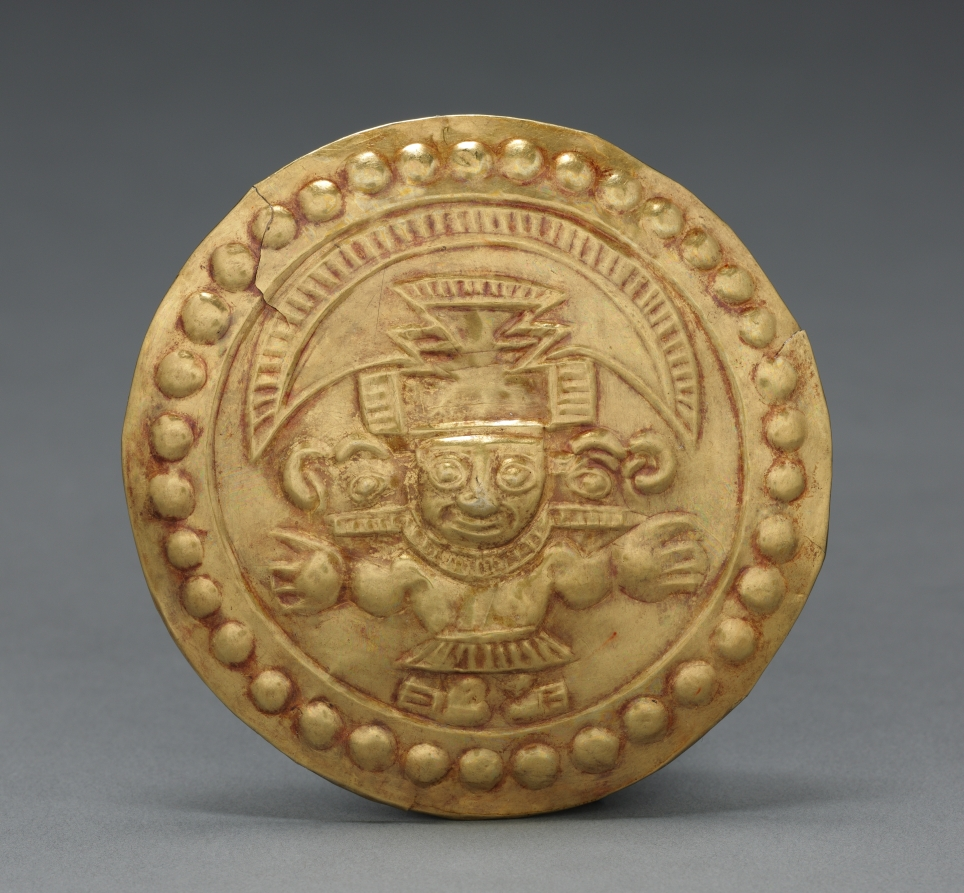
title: Ear Flare Frontal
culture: Peru, North Coast, Paramonga(?), Chimú style (900-1470)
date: Chimú style (900–1470)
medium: hammered gold alloy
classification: Jewelry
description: These discs originally were fastened to the fronts of ear flares like those shown nearby.